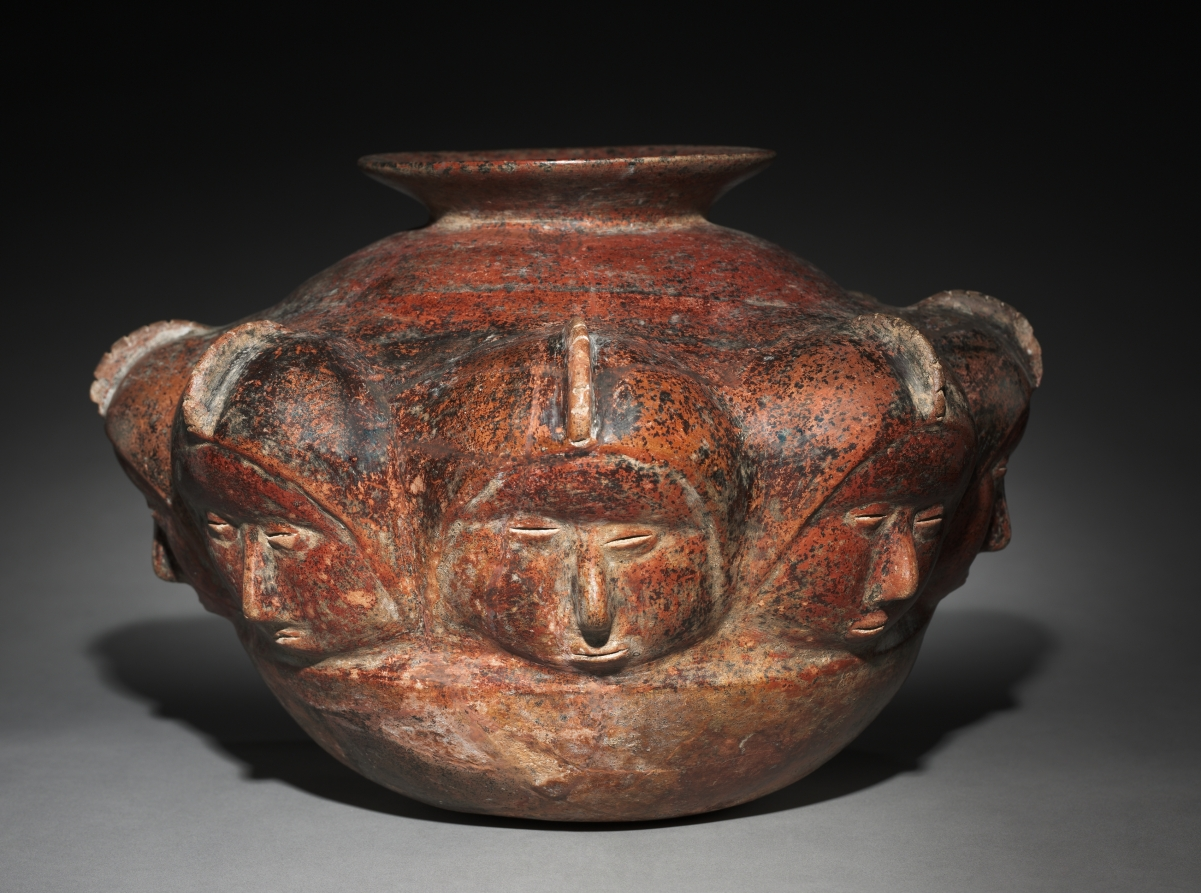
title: Vessel with Crested Heads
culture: West Mexico, Colima, Comala style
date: 200 BCE–300 CE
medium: earthenware with colored slip, black burial deposits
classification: Sculpture